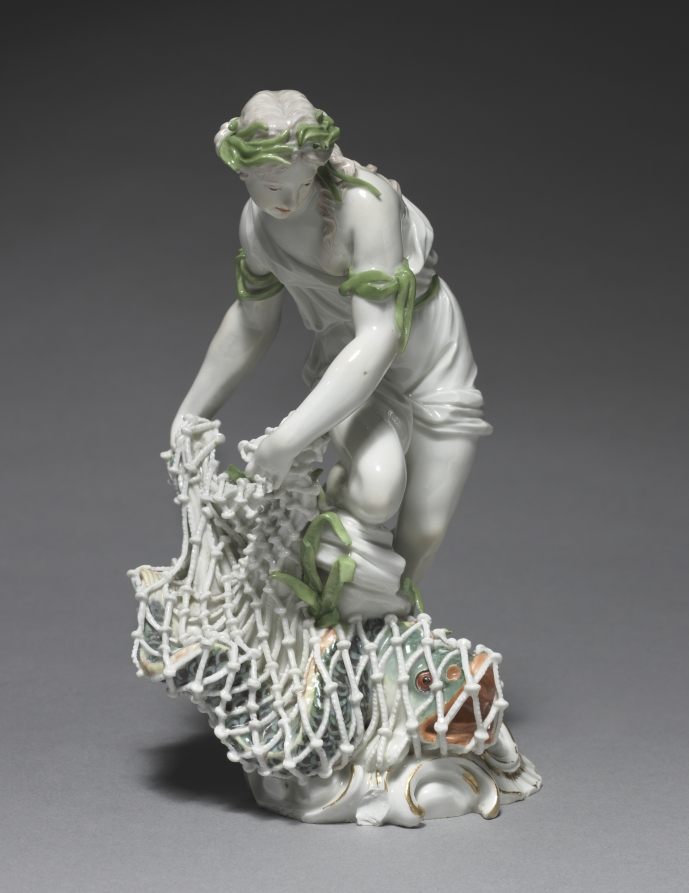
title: Fisherwoman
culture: Germany, 18th century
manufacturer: Ludwigsburg Porcelain Factory (German)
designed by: Johann Christian Wilhelm Beyer (German, 1725–1806)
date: c. 1765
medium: porcelainwith enamel and gilt decoration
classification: Ceramic